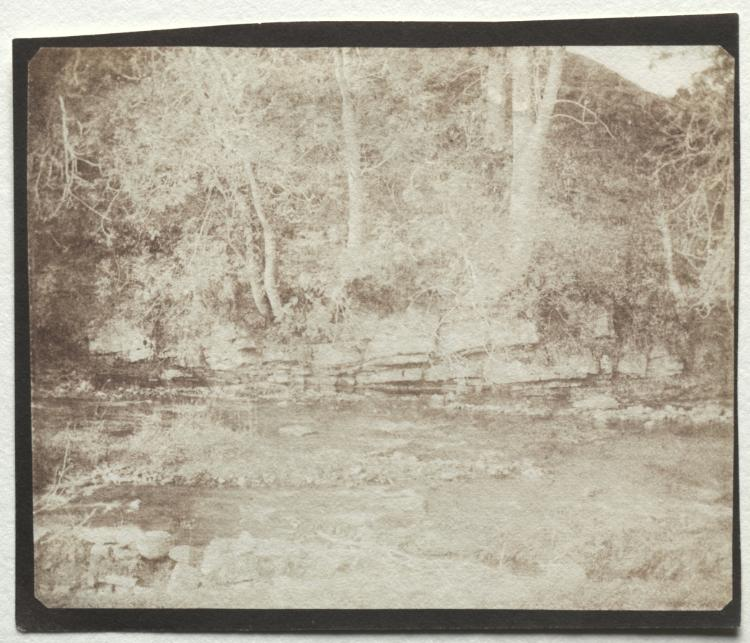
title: A Mountain Rivulet Which Flows at the Foot of Doune Castle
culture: England, 19th century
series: Sun Pictures in Scotland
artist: William Henry Fox Talbot (British, 1800–1877)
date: 1844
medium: salted paper print from calotype negative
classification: Photograph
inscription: Written in ink on verso: "LA 44"